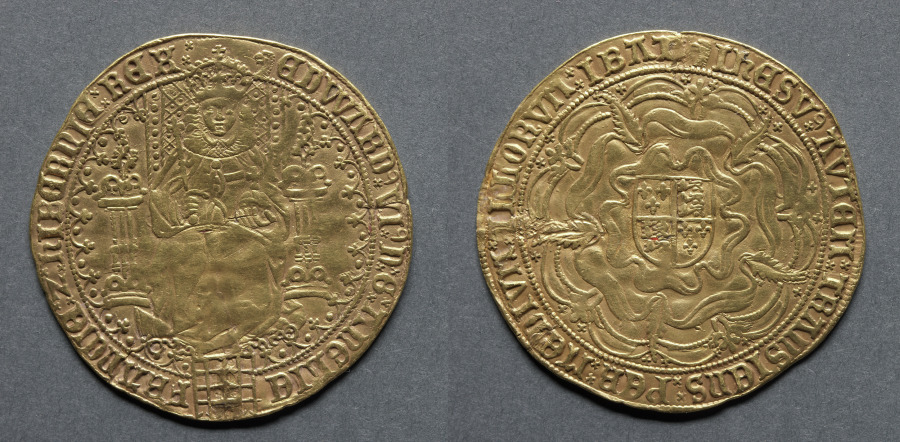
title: Sovereign of Thirty Shillings: Edward VI Enthroned (obverse); Shield of Royal Arms on Rose (reverse)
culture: England, Edward VI, 1547-1553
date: 1550–53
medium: gold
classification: Coins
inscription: EDWARD VI DG ANGILE FRAN DIE Z HIBERNIAE REX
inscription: IHESV AVTEM TRANSIENS PER MEDIVM ILLOVM IBAT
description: This extremely rare coin was struck at the Tower mint during the last period of the reign (1550–53). It was struck in high quality gold of 23 carat 3 1/2 grains, and the mint mark, an ostrich head, is unusual and unknown outside this coinage. The mint mark can be see on the obverse, above Edward's crown and before the text starts.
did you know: The reverse shield of arms shows three fleurs-de-lis for France and three lions for England, each repeated.